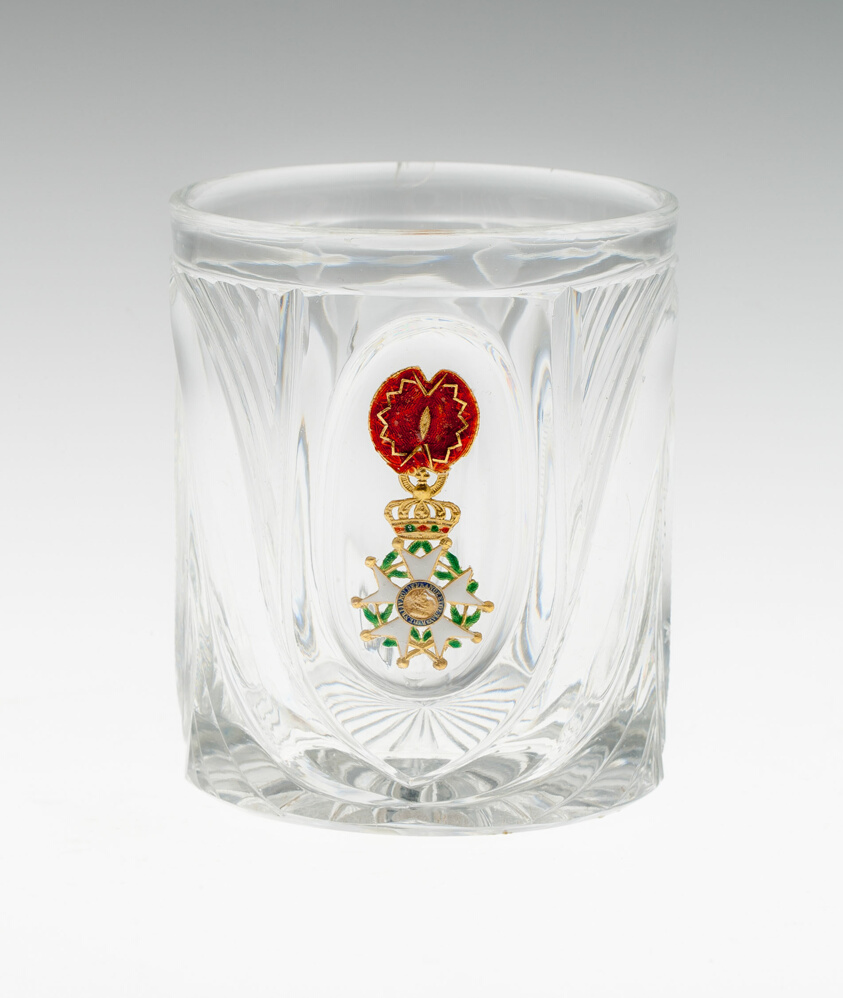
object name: Glass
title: Beaker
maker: France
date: 1835/40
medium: Glass; molded with colored paste inclusion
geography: France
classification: drinking vessel; glass; european decorative arts